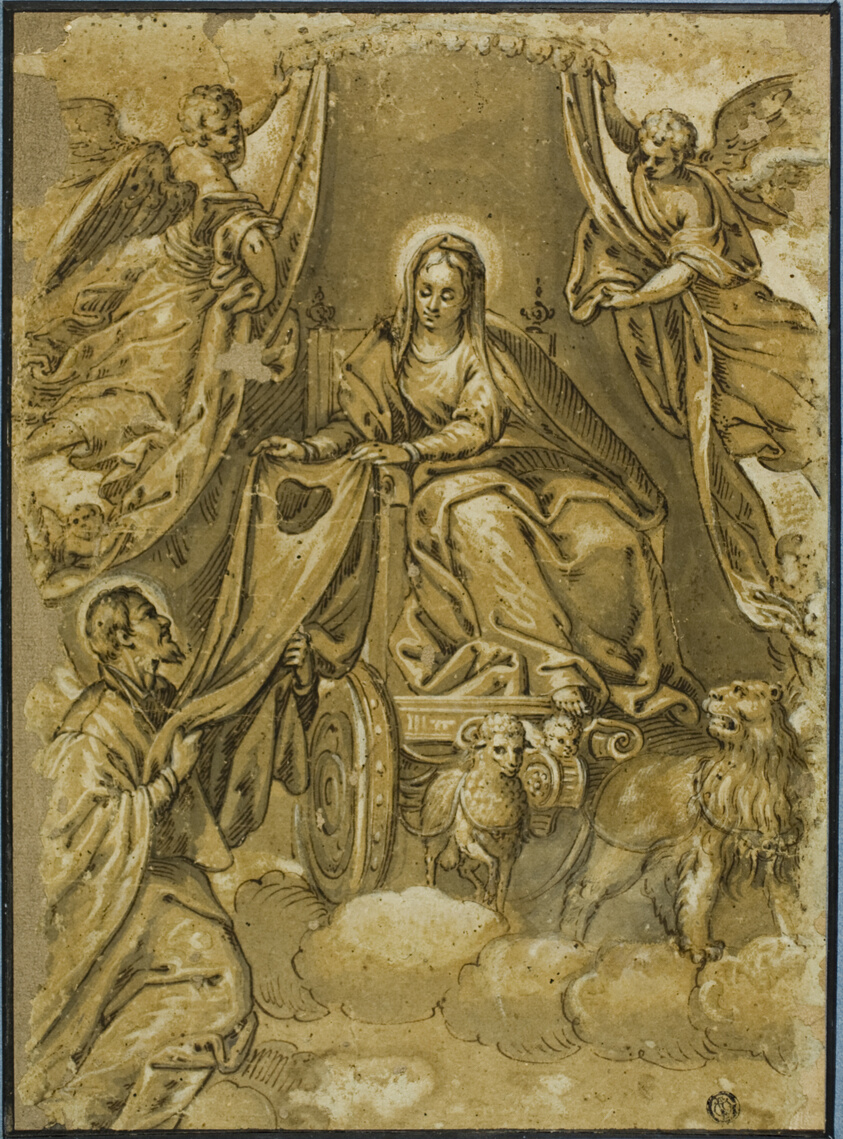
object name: Drawing and Watercolor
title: Virgin Mary Handing Scapular to Saint Simon Stock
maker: Possibly after Paolo Caliari, called Paolo Veronese; Italian, 1528-1588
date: c. 1600-1700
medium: Pen and iron gall ink and brown and gray wash, heightened with lead white, on blue laid paper, laid down on blue wove paper and ivory laid card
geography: Italy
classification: drawings (visual works); prints and drawing